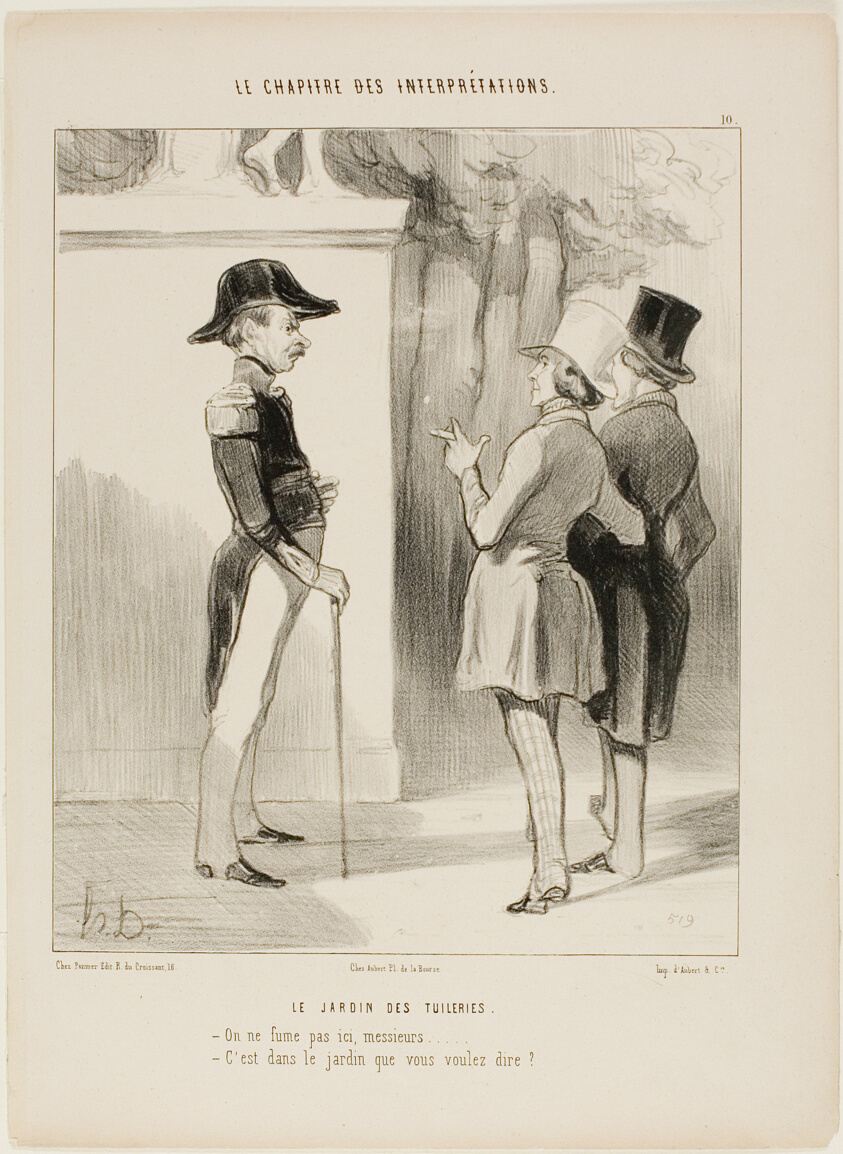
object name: Print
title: The Tuileries Gardens. “- No smoking here, Sir! - You mean in the garden?,” plate 10 from Le Chapitre Des Interprétations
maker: Honoré Victorin Daumier; French, 1808-1879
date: 1843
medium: Lithograph in black on buff wove paper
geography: France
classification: lithograph; print; prints and drawing